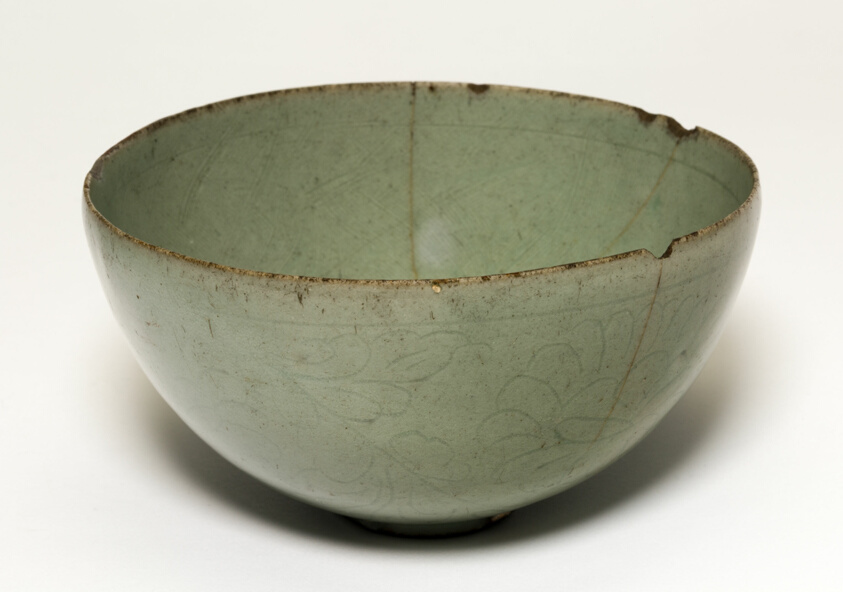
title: Bowl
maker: Korea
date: Goryeo dynasty (918–1392), early 11th century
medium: Celadon-glazed stoneware with underglaze incised decoration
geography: Korea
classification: ceramics; asian art